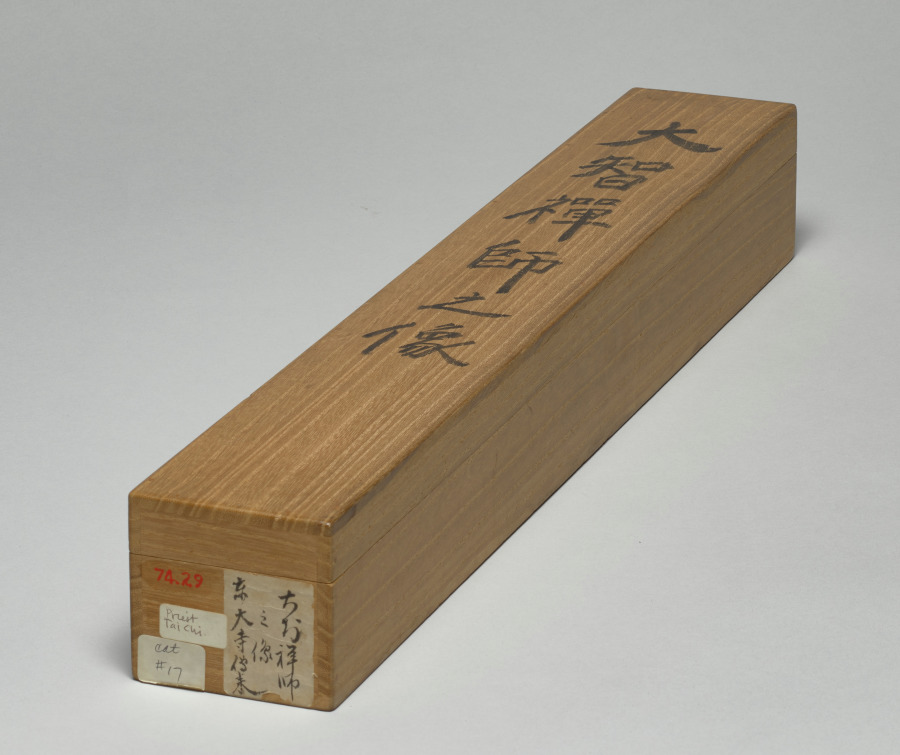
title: Portrait of Priest Dazhi (1048–1116), Master of Law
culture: China, Southern Song dynasty (1127-1279)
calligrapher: Liu Tao (Chinese, late 1000s–early 1100s)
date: 1100s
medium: Hanging scroll; ink and light color on silk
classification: Painting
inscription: Inscription by Liu Tao (late 1000s–early 1100s): Dignified with the perfection of the upasampada,/ His appearance is like his mind;/ Uncompromising and loftily aloof,/ His mind is like his appearance./ To say he is square, he proves to be round;/ He looks timid, yet his spirit is unbound./ Having no attachment, and holding no reins,/ Man and deities alike take refuge in him. (Translation by WKH, 1980)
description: Monk Yuanzhao, with the honorific title Dazhi Lüshi, Great Wisdom Master of Vinaya, is depicted here as an itinerant monk, holding his alms bowl in the left and staff in the right. In 1142, Emperor Gaozong had bestowed Yuanzhao with a posthumous title, mentioned in the inscription, which suggests that the portrait was made after the master’s death. A master of the Lü sect of Buddhism, with a calm benevolent smile on his face, Yuanzhao was active on Mount Tiantai and in Hangzhou. Later, Liu Tao, a southerner from Changxing, added the inscription. The eulogy reads: Dignified he is, perfect in his upasampada [ordination of a monk]. His appearance is like his mind. Uncompromising and aloof. His mind is like his appearance. To say he is square, he proves to be round. He looks timid, yet his spirit is unbound. Having no attachment, and holding no reins, men and deities alike take refuge in him. —translated by Wai-Kam Ho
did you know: A native of Hangzhou, the priest Dazhi was known for his eloquent exposition of Buddhist doctrines and for his success in winning many converts.